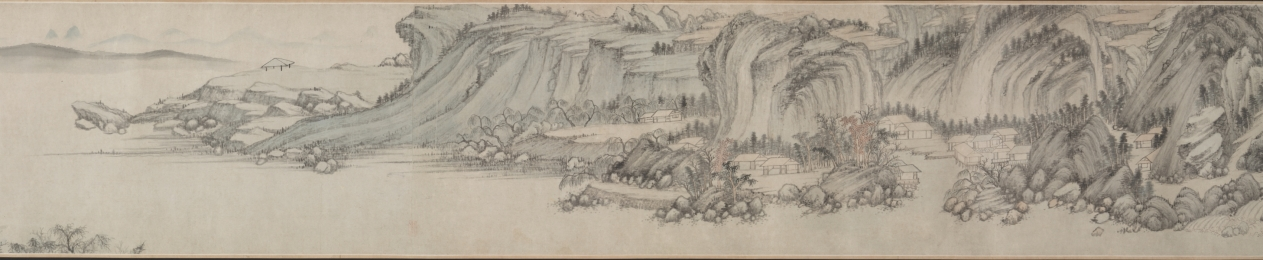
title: Mt. Taibo in the Style of Wang Meng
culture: China, Ming dynasty (1368–1644)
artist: Du Qiong (Chinese, 1396–1474)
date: 1442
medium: handscroll; ink and light color on paper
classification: Painting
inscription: Artist's inscription, signature, and 11 seals: [1 seal] Tung-yüan chai. Huang-ho-shan-ch'iao [Wang Meng] painted a painted called T'ai-po Mountain. Its brushwork is superior and admirable, which is very close to Yu-ch'en [Wang Wei, 699-759]. The cleverness of its composition, the maple groves and rustic temples, the inaccessible ravines and autumnal plateaus, the periolous peaks and strange rocks, etc., all seem to be so natural. The paper is only a little over eight feet, but the landscape has the range of a thousand miles. Once you open and note the contents, it is as if one were roaming among the mountain peaks enveloped in mist and clouds, and forgot the dusty world. When I first saw this, I was so mixed with excitement and joy that I could not take my hands off the painting. So I put it on the table, and tried my best to imitate it, forgetting sleeping and eating for about three months before it was completed. Although I do not dare to tread in the footsteps of Huang-ho shan ch'iao, I took great pains to capture his spirit in composition and colors. I do not know whether it would pass the judgment of the experts. On the fifteenth day of the fifth month, the seventh year of the Cheng-t'ung year [1442], inscribed by Tung-yüan, Tu Chiung. [2 seals] Yung-chia; Ching-chieh ming-men. [8 seals on painting] Tung-yüan chai; Ching-chieh ming-men; Yung-chia; Tu Ch'iung yin; Tung-yüan (repeated 5 times). trans. WKH/LYSL 3 colophons and 7 additional seals: 1 colophon and 2 seals of Chou Ting (1401-1487); 1 colophon and 2 seals of Wu K'uan (1435-1504); 1 colophon, dated 1655, and 2 seals of Lan Ying (1585-after 1664).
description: When a Chinese painter "imitated" a painting by a past master, the intention was never to produce an exact copy. Du Qiong, the Ming painter from Suzhou, is a case in point. The painting style of this handscroll is actually closer to that of Huang Gongwang (1269–1354) than to the style of Wang Meng (about 1301–1385). Both masters were active during the previous dynasty and are among the so-called Four Great Masters of the Yuan dynasty (1279–1368). In this painting, the interplay of styles, including Du Qiong's own, contribute to an inner dimension that is more than visual. Mt. Taibo is located in the province of Zhejiang and is known for its scenic beauty. In this scroll, however, it is not depicted literally. The image is an ideal representation of mountains in southeastern China.